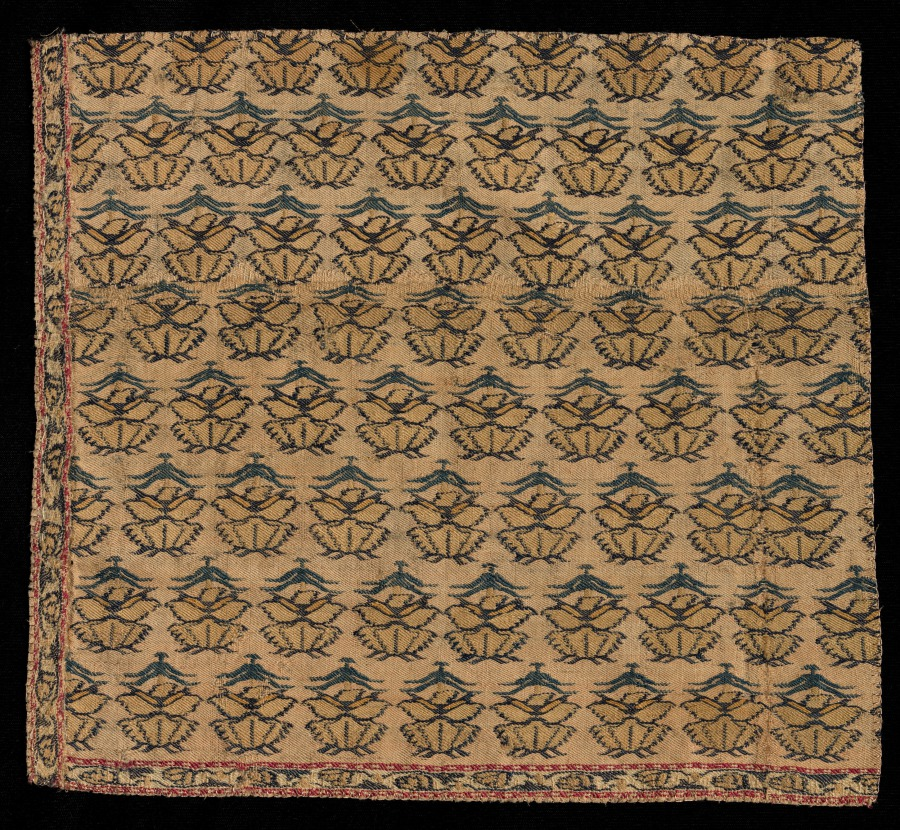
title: Corner Fragment of a Shawl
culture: India, Kashmir, late 18th century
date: late 1700s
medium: tapestry twill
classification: Textile